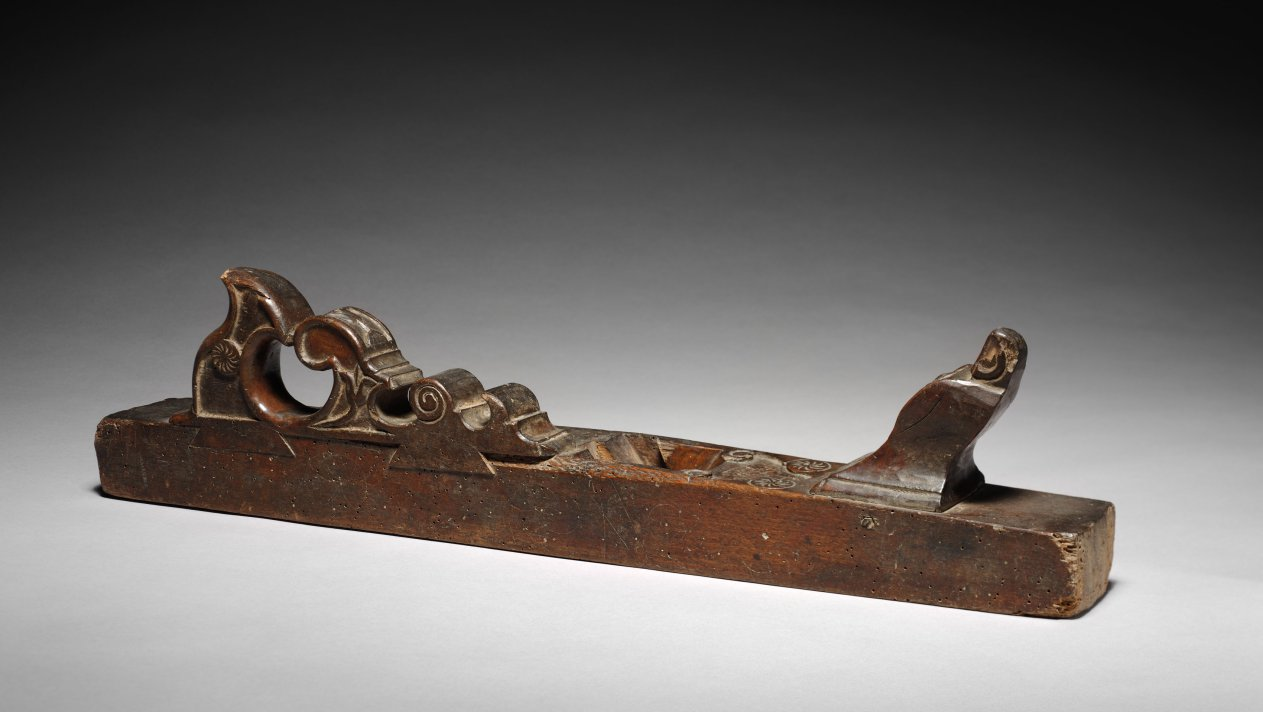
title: Carpenter's Plane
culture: Italy, early 17th century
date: early 1600s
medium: wood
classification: Tool